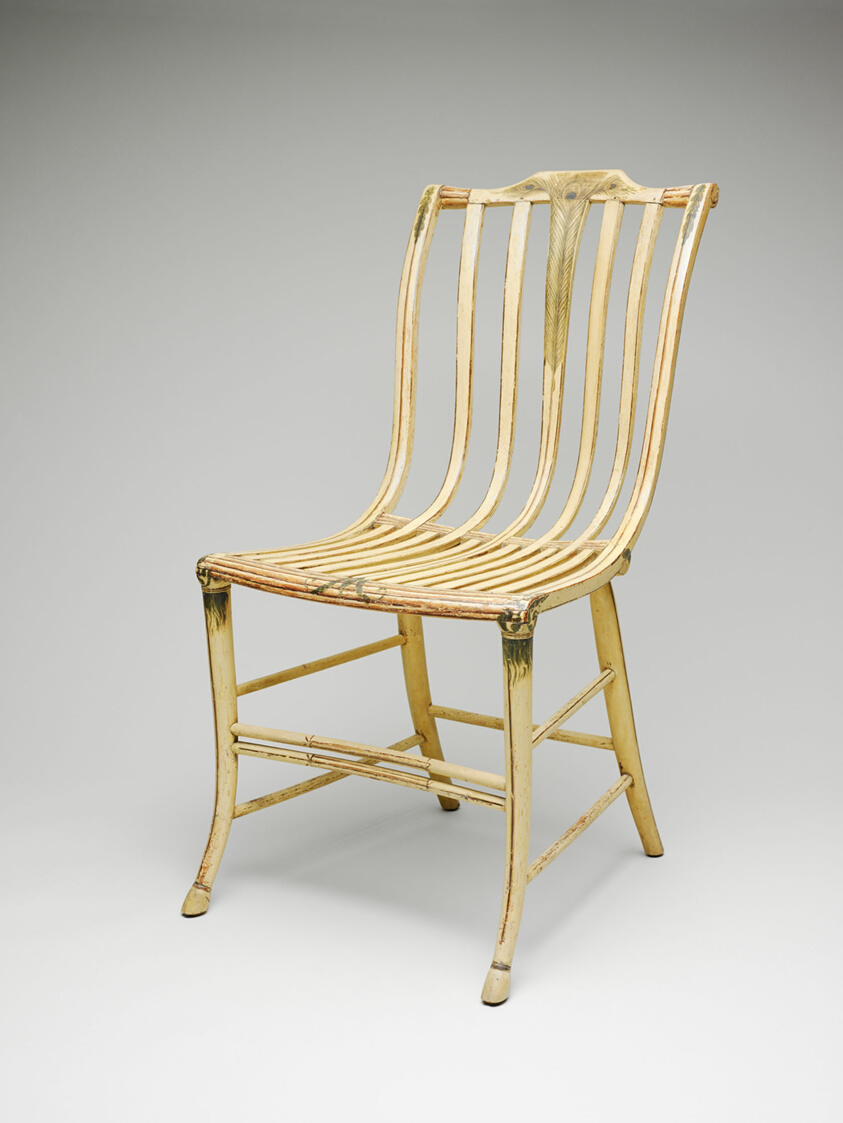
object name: Furniture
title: Side Chair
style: Folk Art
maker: Samuel Gragg (American, 1772–1855); Boston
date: 1808–12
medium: Oak, ash, maple, and paint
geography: Boston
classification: seating; furniture; american decorative arts; american arts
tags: furniture